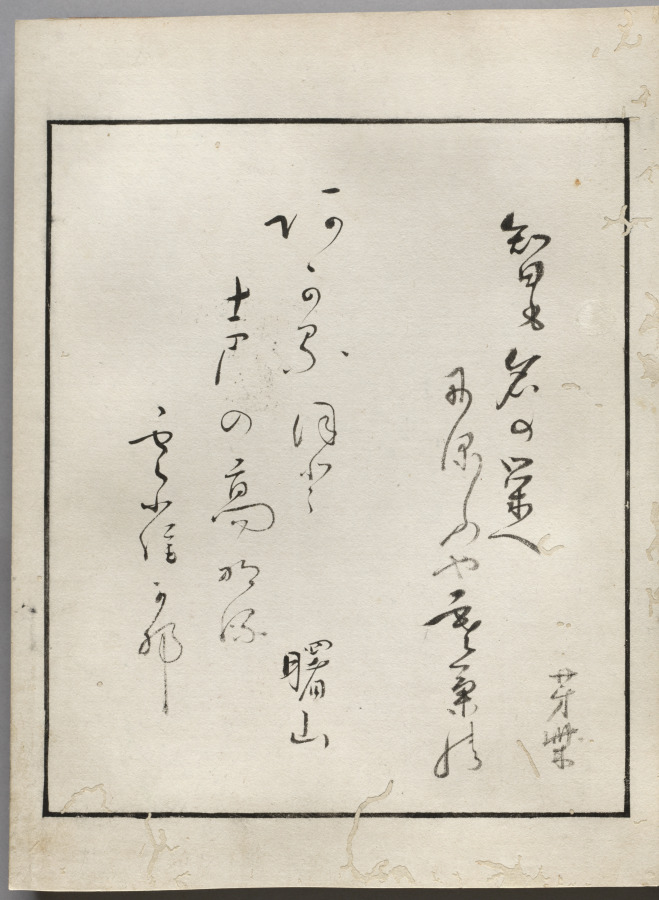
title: Double-Leaf from Album of Actor Portraits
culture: Japan, Edo period (1615–1868)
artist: Shōrakusai (Japanese)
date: c. 1790–1810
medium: double-leaf from an accordion-style album; ink and color on silk (right) and ink on paper (left)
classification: Bound Volume